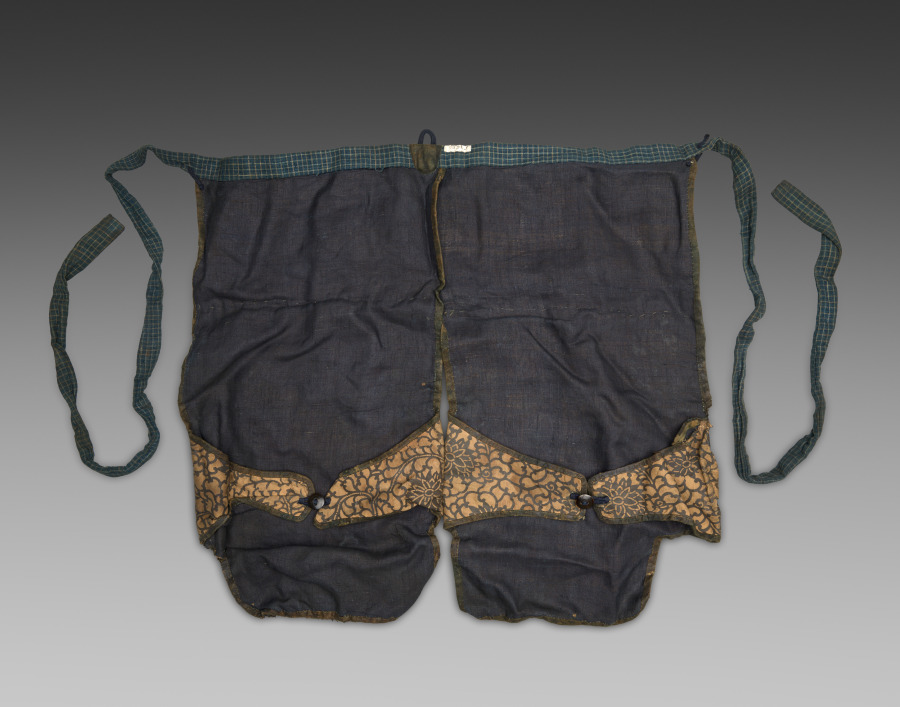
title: Fauld (Kusazuri)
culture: Japan, Edo period (1615–1868)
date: 1615–1868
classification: Arms and Armor